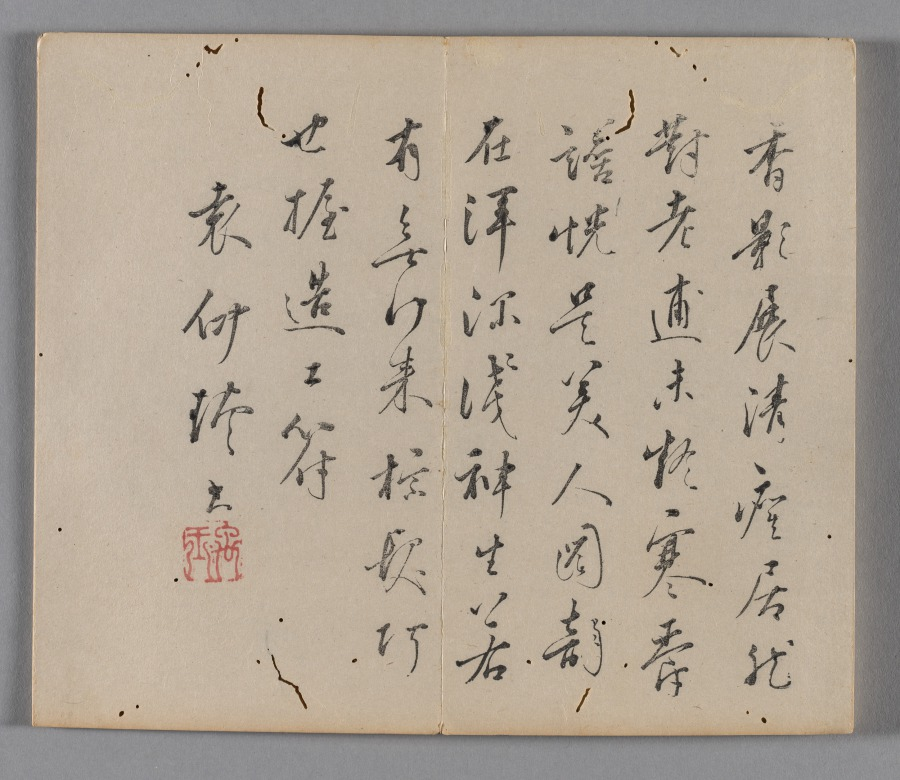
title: Ten Bamboo Studio Collection of Calligraphy and Painting: Miscellaneous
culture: China, Qing dynasty (1644-1911)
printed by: Hu Zhengyan (Chinese, c. 1584–1674)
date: 1633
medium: Woodblock-printed book; ink and colors on paper; first edition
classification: Print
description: Color printing reached a level of perfection in the early 1600s, as seen in this Ten Bamboo Studio Collection of Calligraphy and Painting and the Mustard Seed Garden Manual of Painting (printed 1679 and 1701). The painterly quality, precision in registering (aligning) the woodblocks, and harmonious colors made them the most successful color print editions in Chinese history. Both editions were printed and compiled in Nanjing, spread nationwide, and had a great impact on the arts in Japan and Korea.